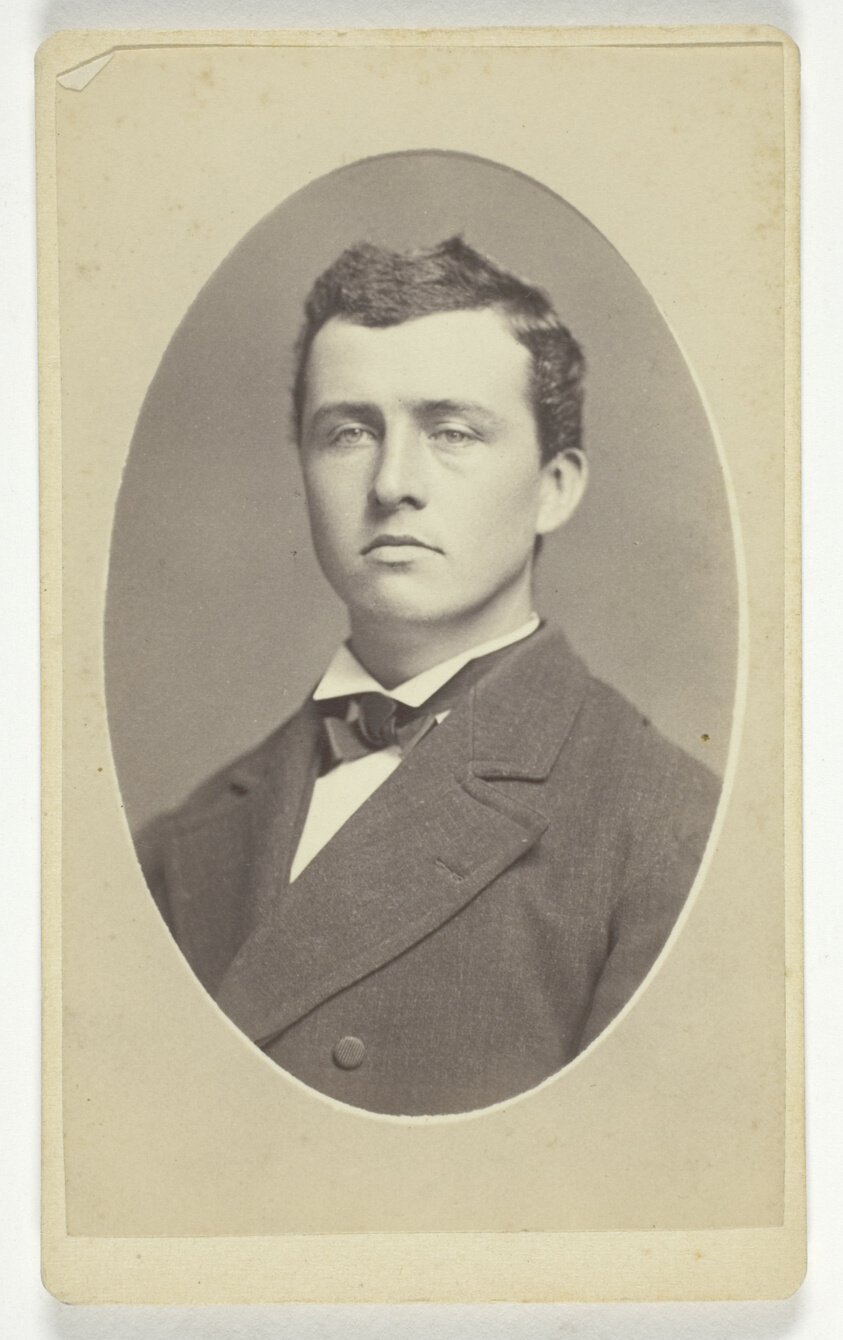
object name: Photograph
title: Untitled (Portrait of Man)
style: 19th century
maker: E. J. Dunshee; American, 19th century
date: 1876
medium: Albumen print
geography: United States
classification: photography; photograph